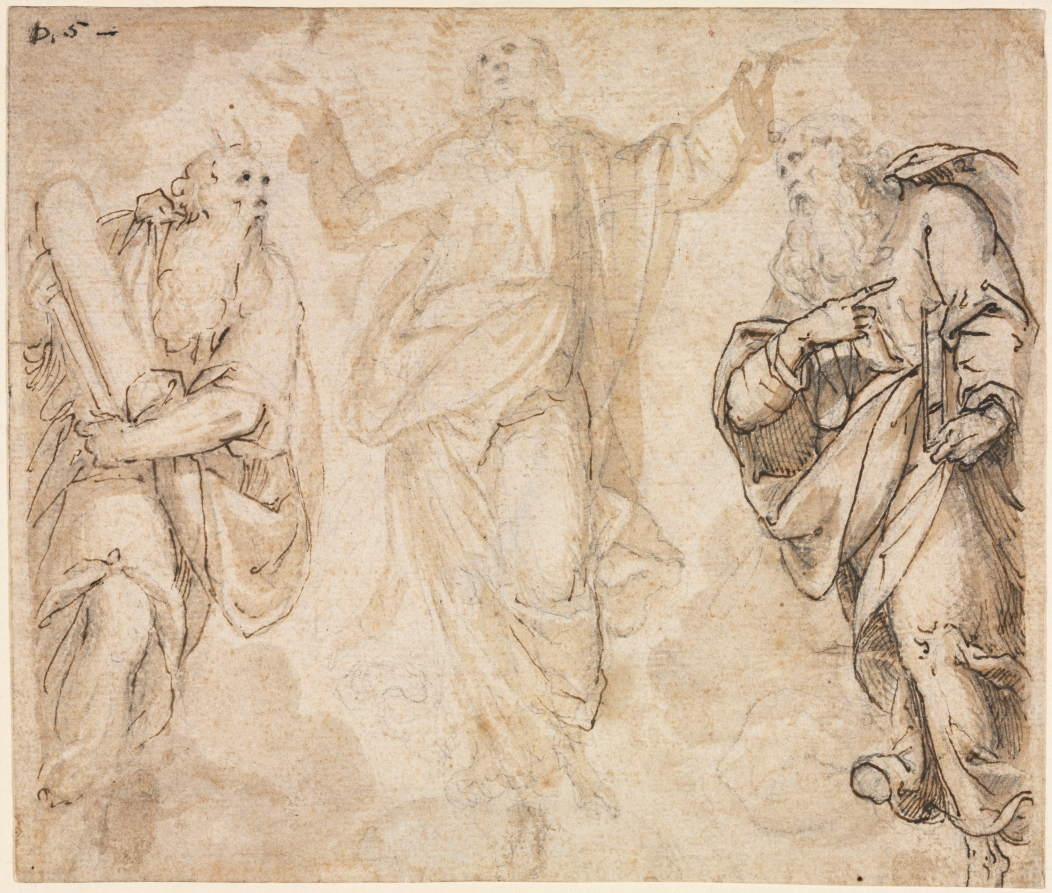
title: The Transfiguration (recto)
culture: Italy, 16th century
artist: Camillo Procaccini (Italian, 1546–1629)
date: c. 1590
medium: pen and brown ink and graphite and brush and brown wash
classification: Drawing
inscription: upper left, in brown ink: D. 5 -